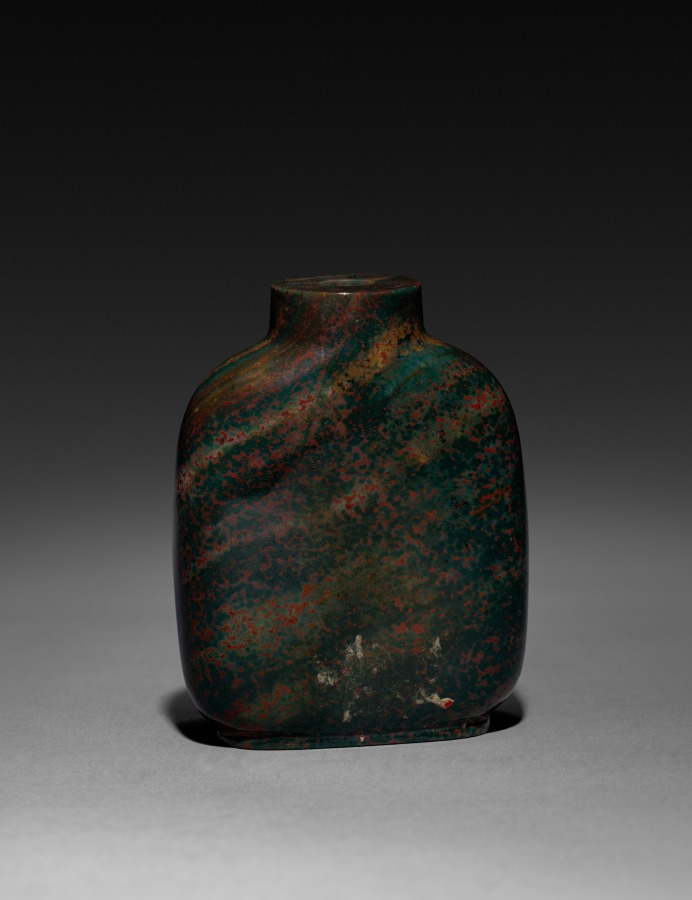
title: Snuff Bottle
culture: China, Qing dynasty (1644-1911)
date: 1644–1911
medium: glass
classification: Glass